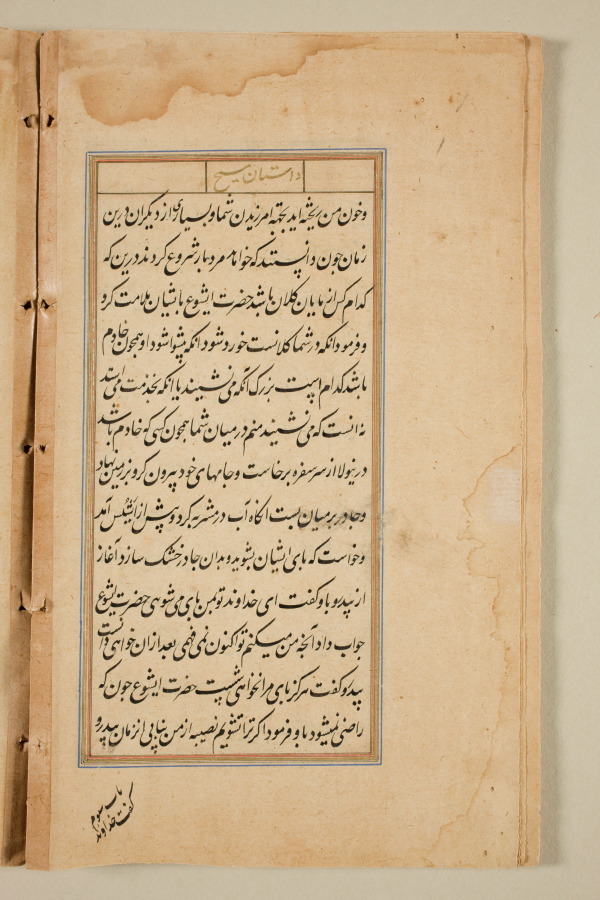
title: Text page from a Mirror of Holiness (Mir’at al-quds) of Father Jerome Xavier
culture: Mughal India, Allahabad, made for Prince Salim (1569–1627)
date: 1602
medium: Ink and gold on paper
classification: Manuscript